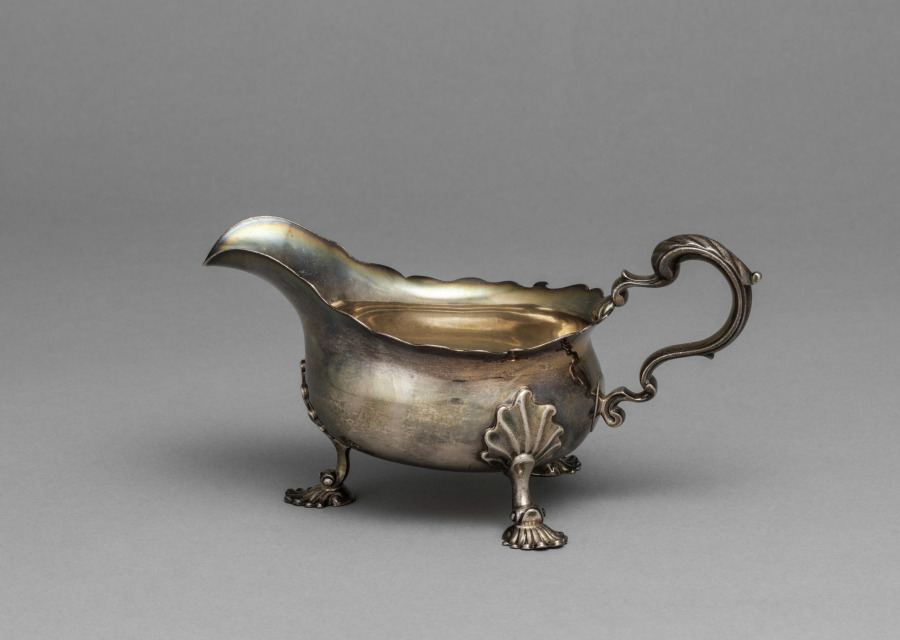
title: Gravy Boat (1 of 2)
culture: England, 18th century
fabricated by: Samuel Wood (British)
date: 1746–1747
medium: silver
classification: Silver